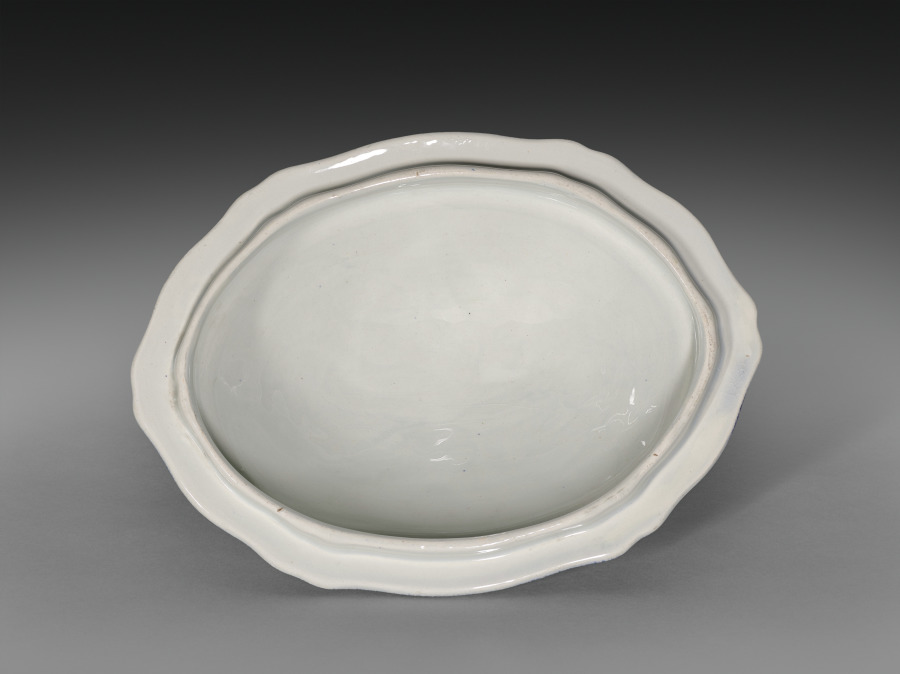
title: Cover for a Tureen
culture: France, Creil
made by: Creil Factory (French)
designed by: Félix Bracquemond (French, 1833–1914)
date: 1866–75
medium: porcelain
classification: Ceramic